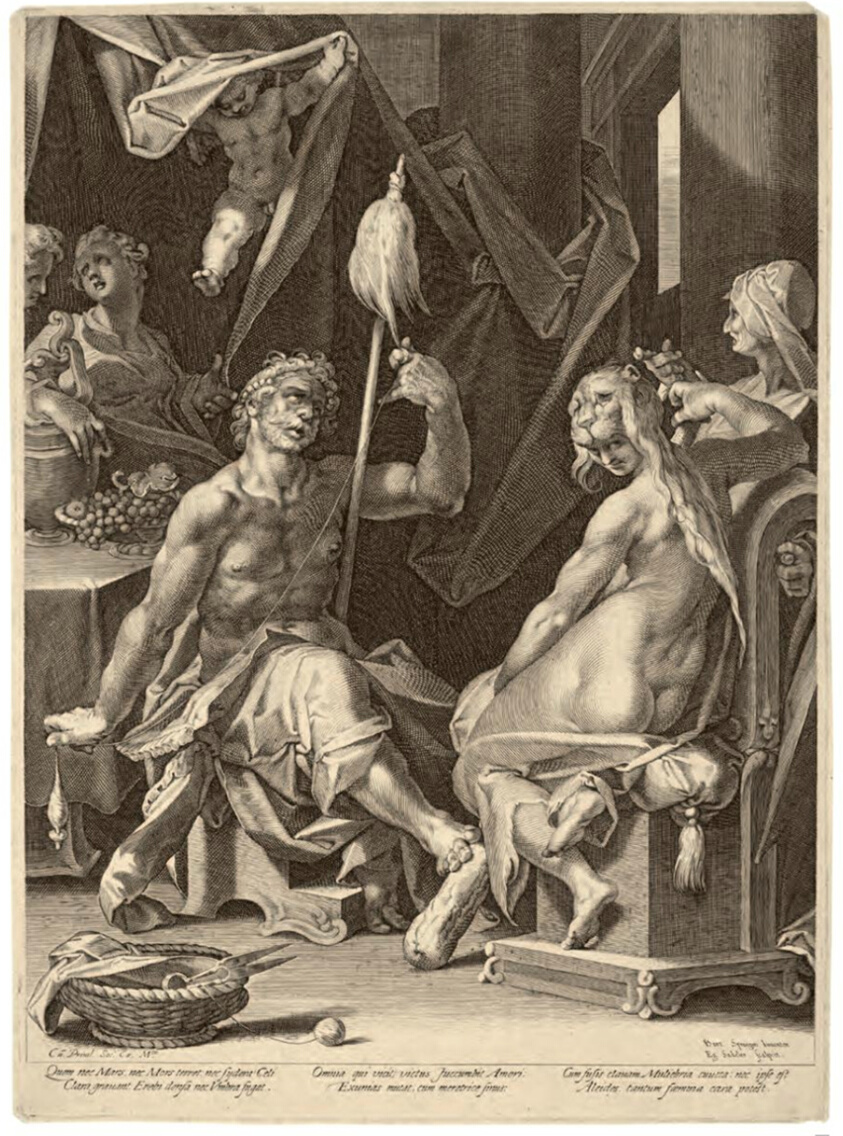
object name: Print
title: Hercules and Omphale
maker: Aegidius Sadeler, II (Flemish, c. 1570–1629); after Bartholomaeus Spranger (Flemish, 1546–1611)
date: c. 1600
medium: Engraving in black on ivory laid paper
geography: Flanders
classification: prints and drawing; paper; print; engraving